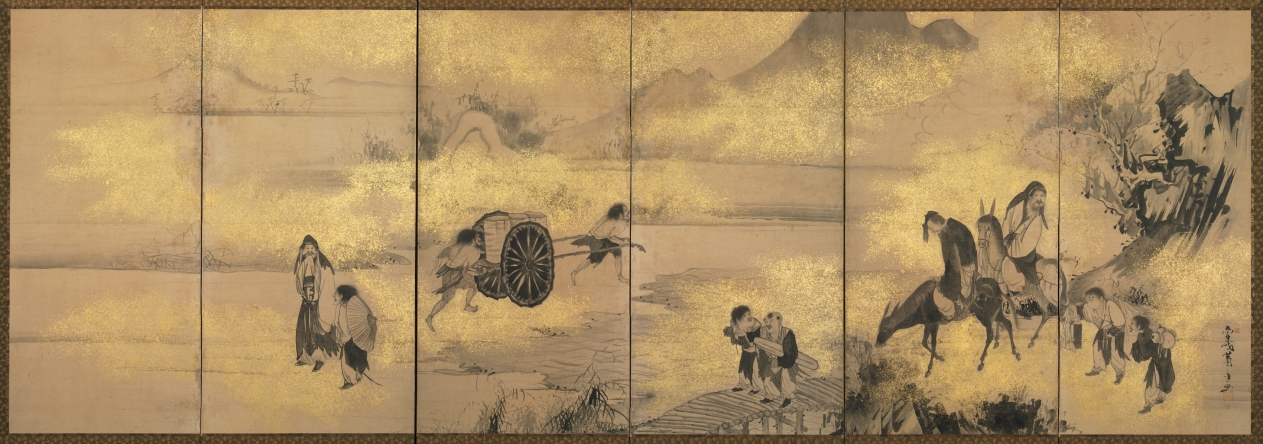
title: The Eight Immortals of the Wine Cup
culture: Japan, Edo period (1615–1868)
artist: Soga Shōhaku (Japanese, 1730–1781)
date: later 1700s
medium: Six-panel folding screen, ink and cut-gold foil on paper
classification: Painting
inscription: signature, lower right corner.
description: Responding to the desires of the middle class (chonin), some Japanese painters of the late Edo period moved away from the seriousness associated with the Chinese theme of reclusion, focusing instead on the motif’s humorous aspects. The theme Eight Immortals of the Wine Cup is based on a poem by the renowned 8th-century Chinese poet Du Fu about his eight colleagues. These scholars eagerly sought release from their official governmental duties and then supposedly fled the capital for the countryside. There, they engaged in wildly eccentric behavior and adventurous creative work, all fueled by copious amounts of wine. Shohaku’s version of events exaggerates the scholars’ pleasure, as seen in their comical facial expressions.